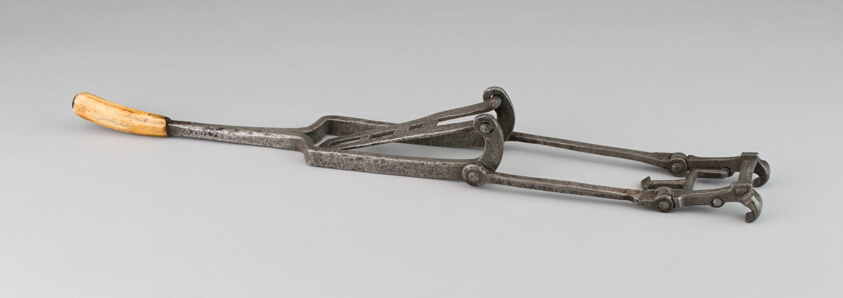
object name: Arms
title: "Goat's Foot" Spanner for a Crossbow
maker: European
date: early 16th century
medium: Iron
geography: Europe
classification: crossbow; arms; arms and armor